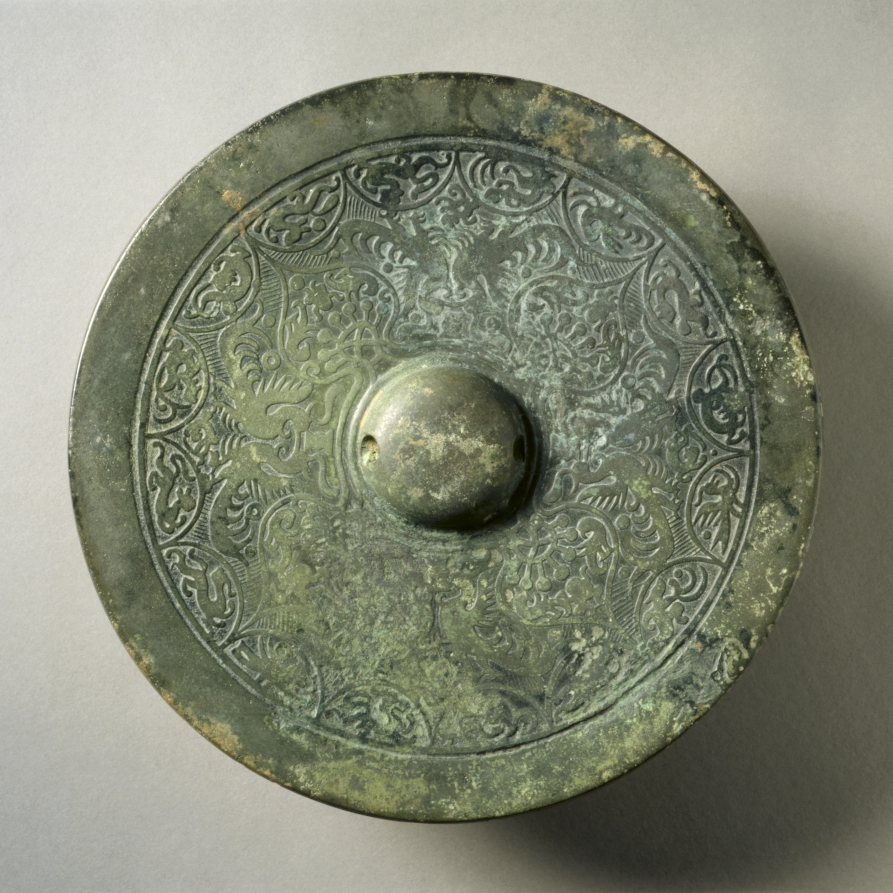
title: Mirror with Quatrefoil, Paired Phoenixes, and Auspicious Animals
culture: China, Three Kingdoms (221–280 CE)–Western Jin dynasty (265–316 CE)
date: 221–316 CE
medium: bronze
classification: Metalwork